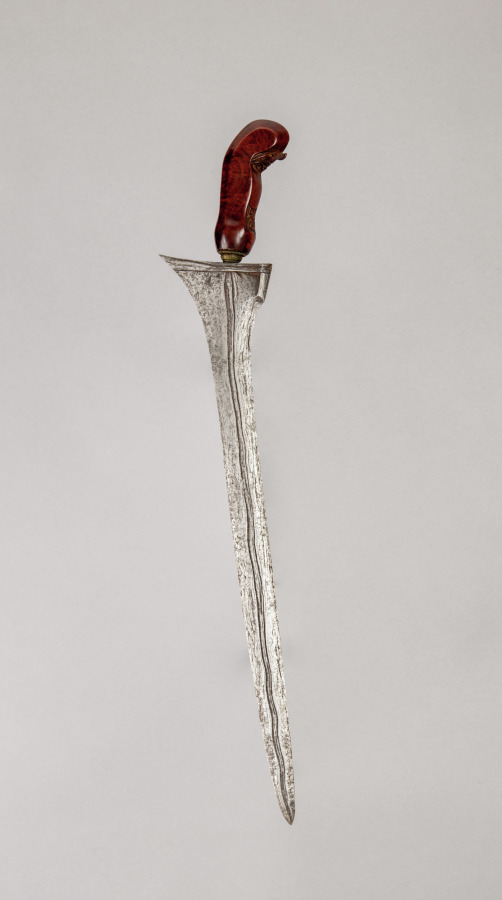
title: Sword (Kris)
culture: Java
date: 1800s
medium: iron with carved wooden handle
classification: Arms and Armor